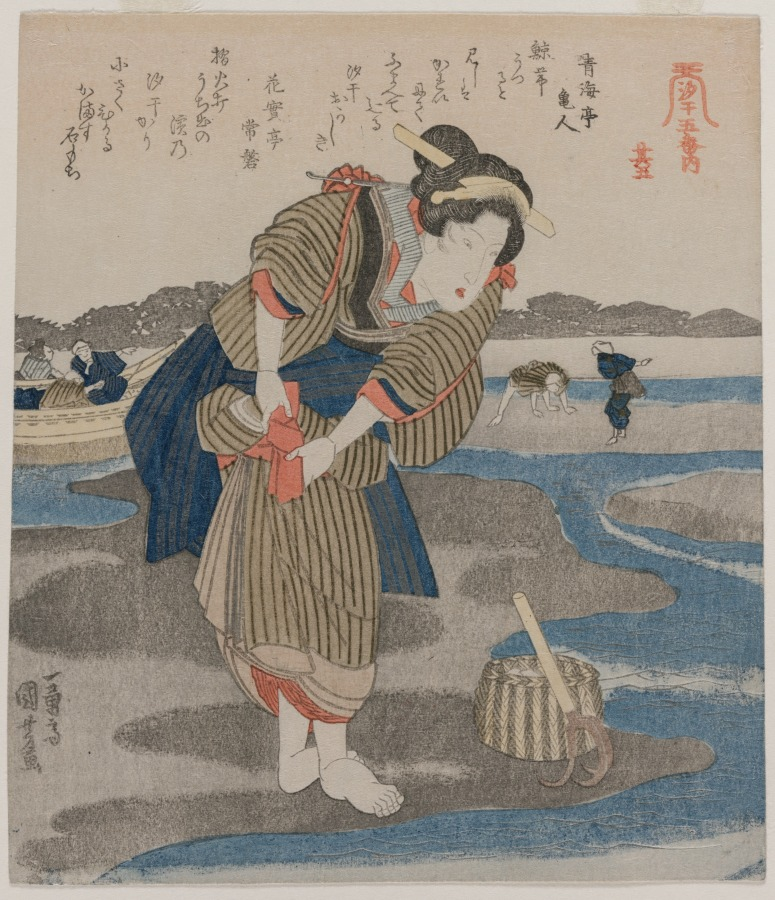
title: Fifth Print from A Low Tide Pentaptych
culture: Japan, Edo period (1615–1868)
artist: Utagawa Kuniyoshi (Japanese, 1797–1861)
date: c. 1830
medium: color woodblock print from a pentaptych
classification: Print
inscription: Signature: Ichiyusai Kuniyoshi ga.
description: This is one of five surimono, privately commissioned prints, making up an image of people collecting sea life at low tide. Ten witty poems, written by members of a poetry circle, appear across the upper part of the composition, with two poems on each print. Based in Edo (now Tokyo), the group was led by Hisakataya Misora (active 1810s–30s), who wrote four of the poems. This composition may have been printed in April, which was considered the best time for beachcombing.